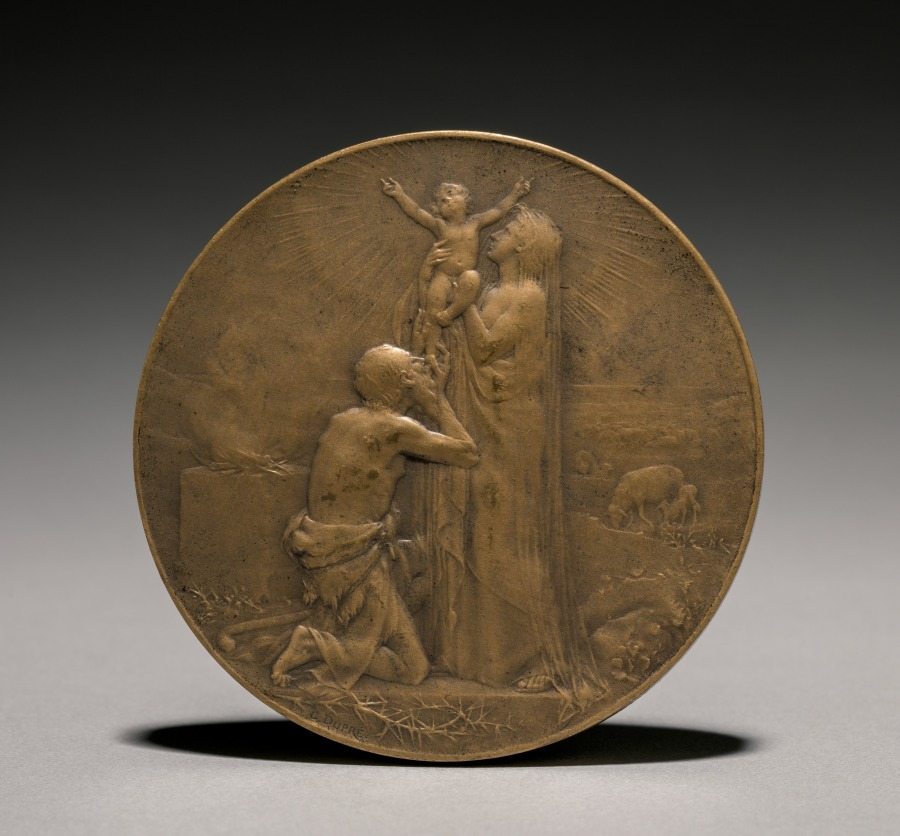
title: Medal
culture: France, 19th century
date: 1800s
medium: bronze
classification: Metalwork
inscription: reverse - "O Crux ave spes unica."